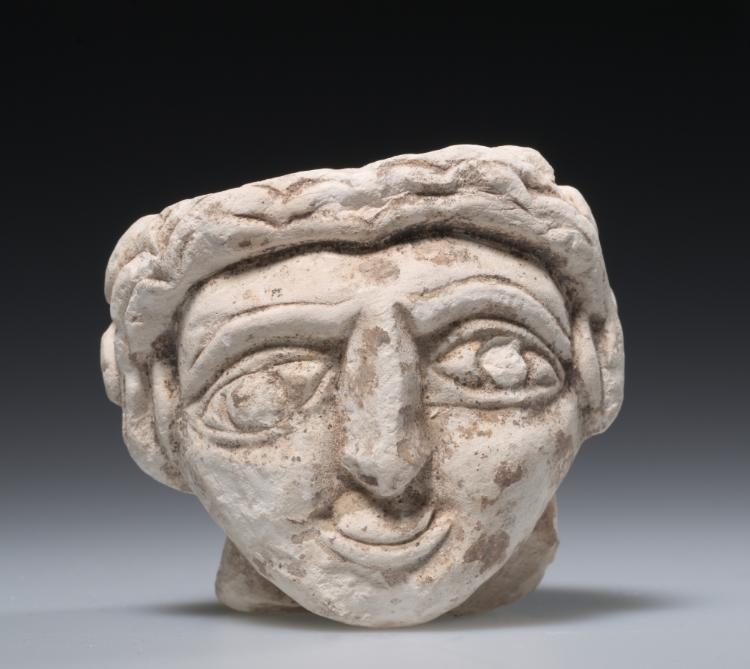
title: Female Head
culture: Egypt, Coptic period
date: 400s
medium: limestone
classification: Sculpture